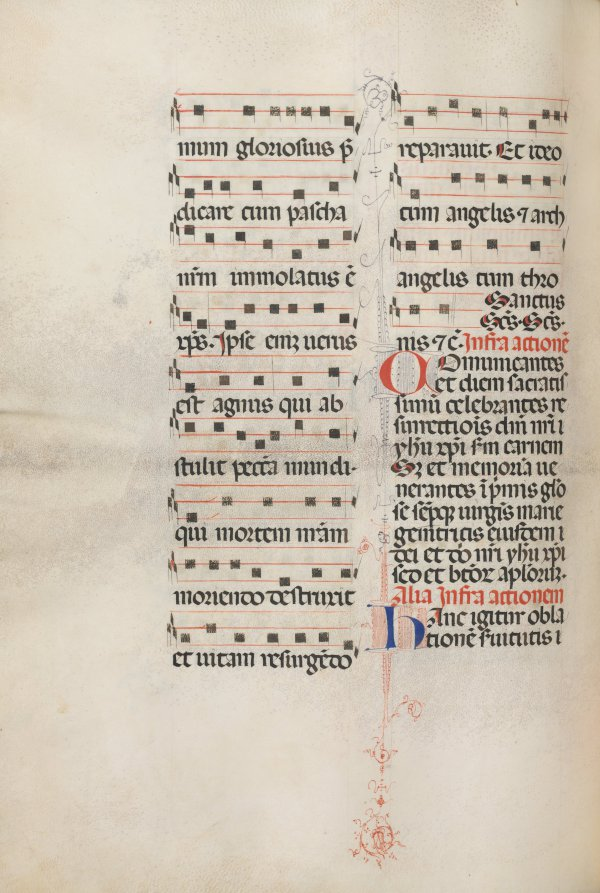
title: Missale: Fol. 179v: Music for various ordinary prayers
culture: Italy, Perugia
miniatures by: Bartolommeo Caporali (Italian, c. 1420–1503)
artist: assisted by Giapeco Caporali (Italian, d. 1478)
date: 1469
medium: ink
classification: Bound Volume